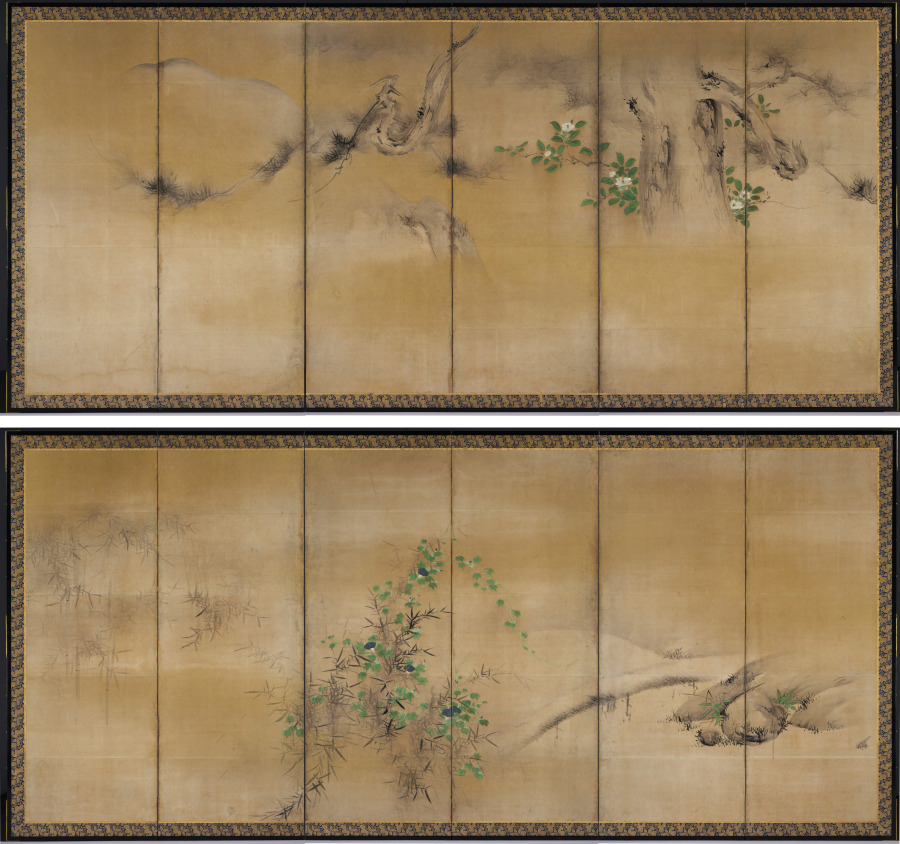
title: Winter and Summer Flowers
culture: Japan, Momoyama period (1573–1615)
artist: Kaihō Yūshō (Japanese, 1533–1615)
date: c. 1600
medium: Pair of six-panel folding screens; ink, color, and gold on paper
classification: Painting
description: White camellias bloom behind a large pine in the right screen and blue morning glories creep through bamboo in the left screen of this composition. The mountains and bridge suggest a continuous landscape, but the paintings actually juxtapose flowers of winter and summer, with time progressing from right to left. Kaihō Yūshō painted similar landscapes for Zen temples in Kyoto.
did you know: The pine and bamboo are defined by ink wash, but the flowers take form through color within contour lines.